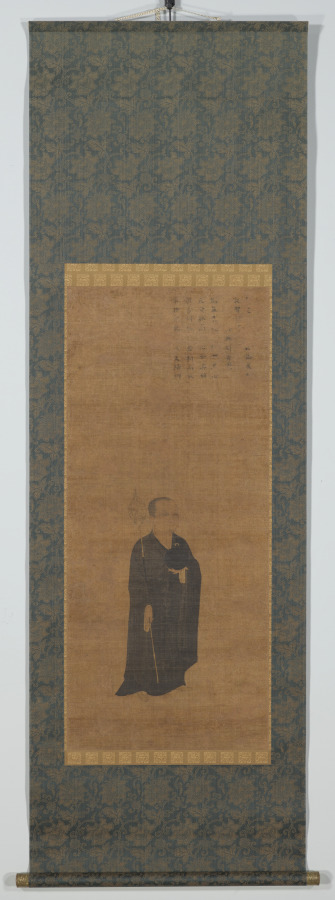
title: Portrait of Priest Dazhi (1048–1116), Master of Law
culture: China, Southern Song dynasty (1127-1279)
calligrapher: Liu Tao (Chinese, late 1000s–early 1100s)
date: 1100s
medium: Hanging scroll; ink and light color on silk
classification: Painting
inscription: Inscription by Liu Tao (late 1000s–early 1100s): Dignified with the perfection of the upasampada,/ His appearance is like his mind;/ Uncompromising and loftily aloof,/ His mind is like his appearance./ To say he is square, he proves to be round;/ He looks timid, yet his spirit is unbound./ Having no attachment, and holding no reins,/ Man and deities alike take refuge in him. (Translation by WKH, 1980)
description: Monk Yuanzhao, with the honorific title Dazhi Lüshi, Great Wisdom Master of Vinaya, is depicted here as an itinerant monk, holding his alms bowl in the left and staff in the right. In 1142, Emperor Gaozong had bestowed Yuanzhao with a posthumous title, mentioned in the inscription, which suggests that the portrait was made after the master’s death. A master of the Lü sect of Buddhism, with a calm benevolent smile on his face, Yuanzhao was active on Mount Tiantai and in Hangzhou. Later, Liu Tao, a southerner from Changxing, added the inscription. The eulogy reads: Dignified he is, perfect in his upasampada [ordination of a monk]. His appearance is like his mind. Uncompromising and aloof. His mind is like his appearance. To say he is square, he proves to be round. He looks timid, yet his spirit is unbound. Having no attachment, and holding no reins, men and deities alike take refuge in him. —translated by Wai-Kam Ho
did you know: A native of Hangzhou, the priest Dazhi was known for his eloquent exposition of Buddhist doctrines and for his success in winning many converts.